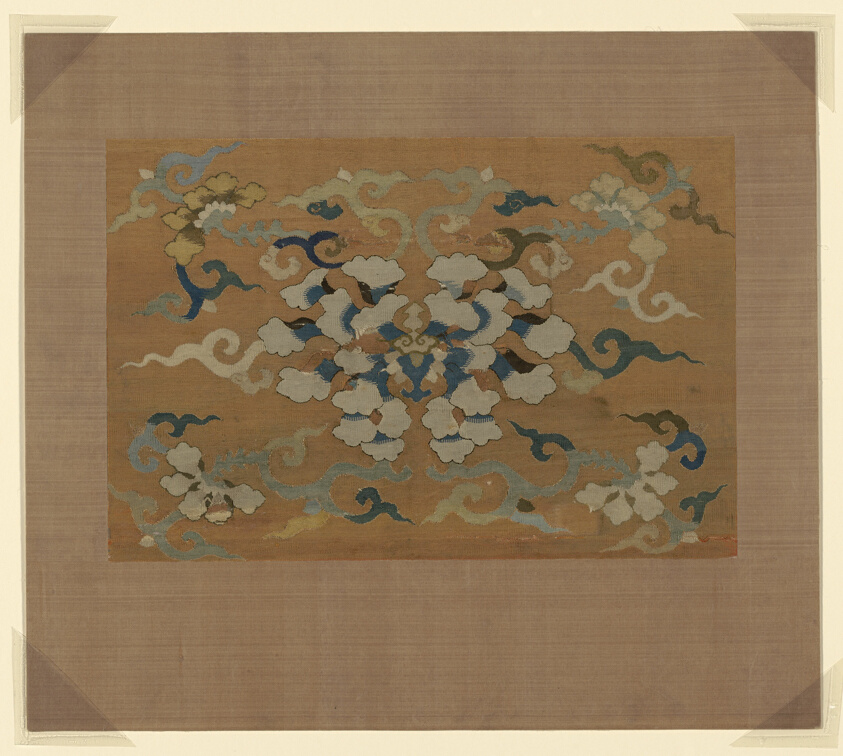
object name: Textile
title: Fragment (From a Chair Strip)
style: qing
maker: China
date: Qing Dynasty (1644–1911), 1700/50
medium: Silk, gold-leaf on lacquered-paper-strip-wrapped silk; slit and dovetail tapestry weave with interlacing outlining wefts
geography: China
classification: textile; weaving